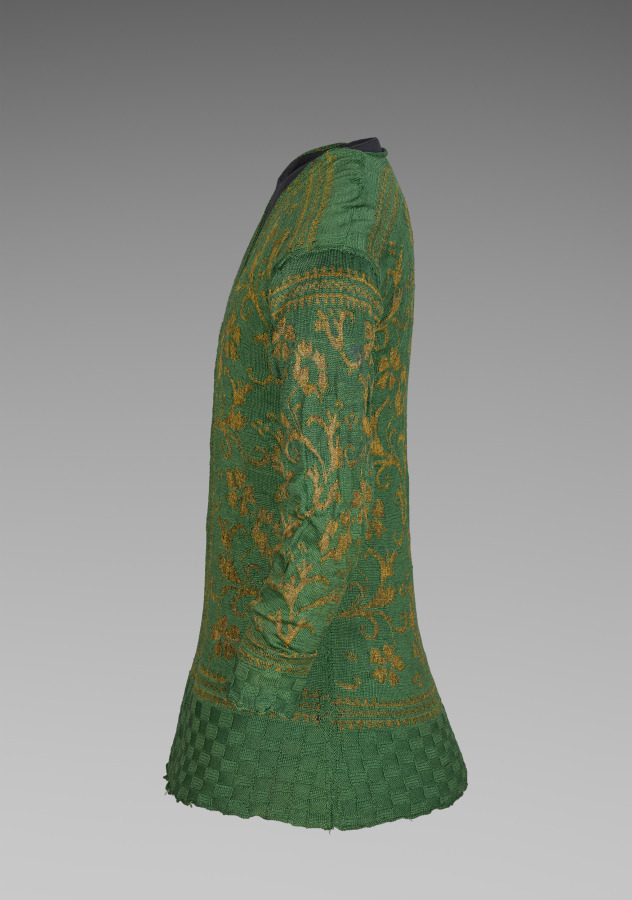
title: Knitted Hunting Jacket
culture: Italy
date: 1600s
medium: knitted silk with gold thread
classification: Garment